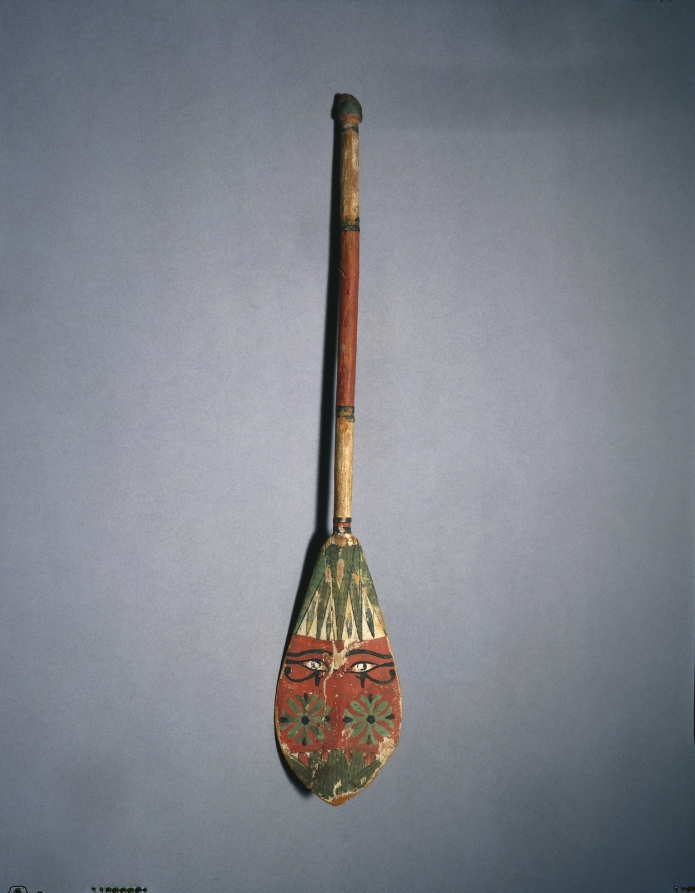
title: Model Steering Oar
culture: Egypt, Middle Kingdom (2040–1648 BCE)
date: 2040–1648 BCE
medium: painted tamarisk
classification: Funerary Equipment